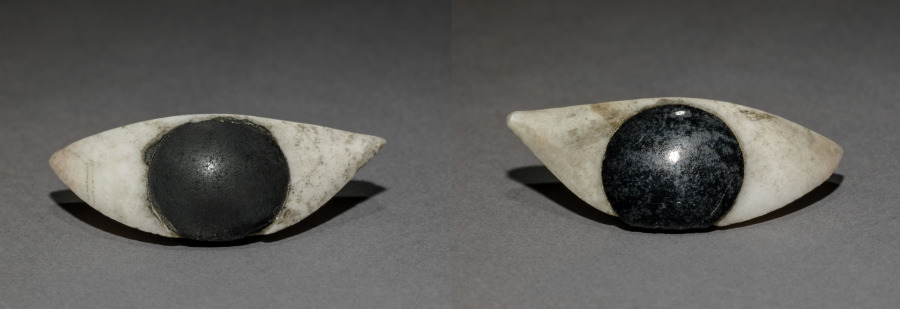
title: Pair of Inlay Eyes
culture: Egypt, Haraga, cemetery E, tomb 614, excavated in 1914, Middle Kingdom (2040–1648 BCE), Dynasty 12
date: 1980–1801 BCE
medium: travertine and obsidian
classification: Funerary Equipment